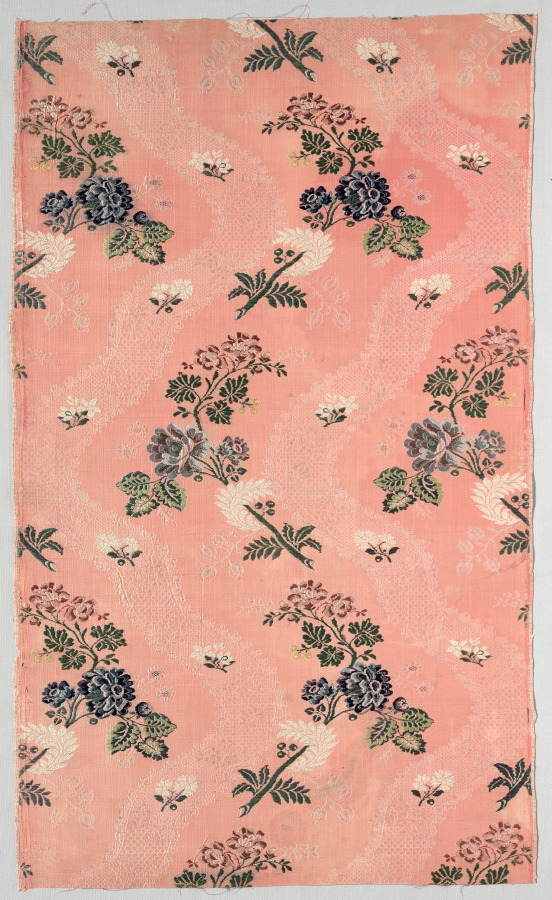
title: Lengths of Textile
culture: France, 18th century, Period of Louis XV (1723-1774)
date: 1723–1774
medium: brocade, silk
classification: Textile